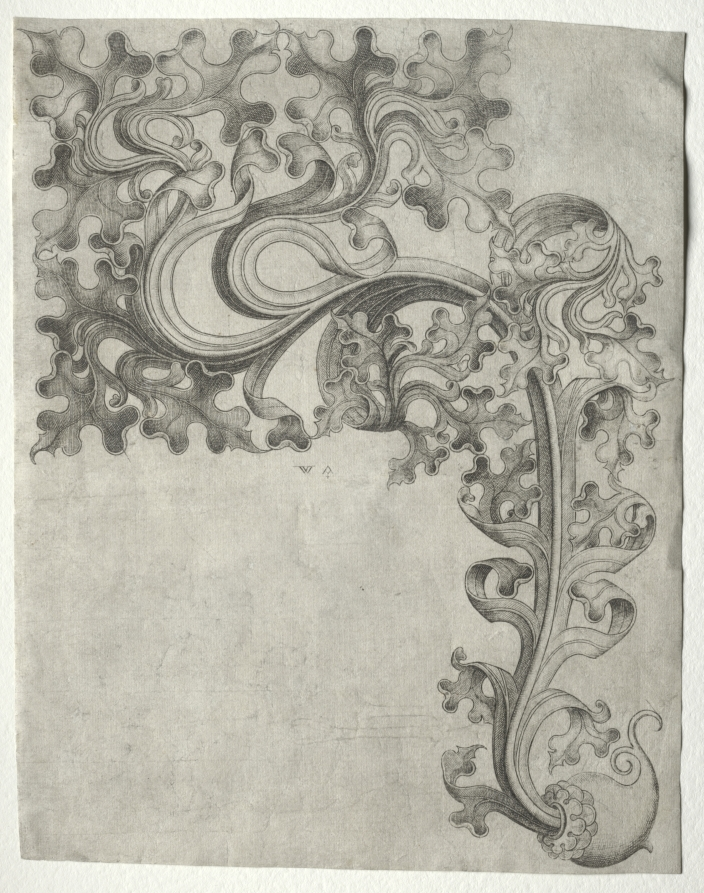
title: An Oak Leaf Ornament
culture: Flanders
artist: Master W with the Key (Netherlandish, active about 1465–1490)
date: c. 1470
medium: engraving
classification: Print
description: The impression of the oak leaf is unique, as are the other nine leaf ornaments engraved by this master.